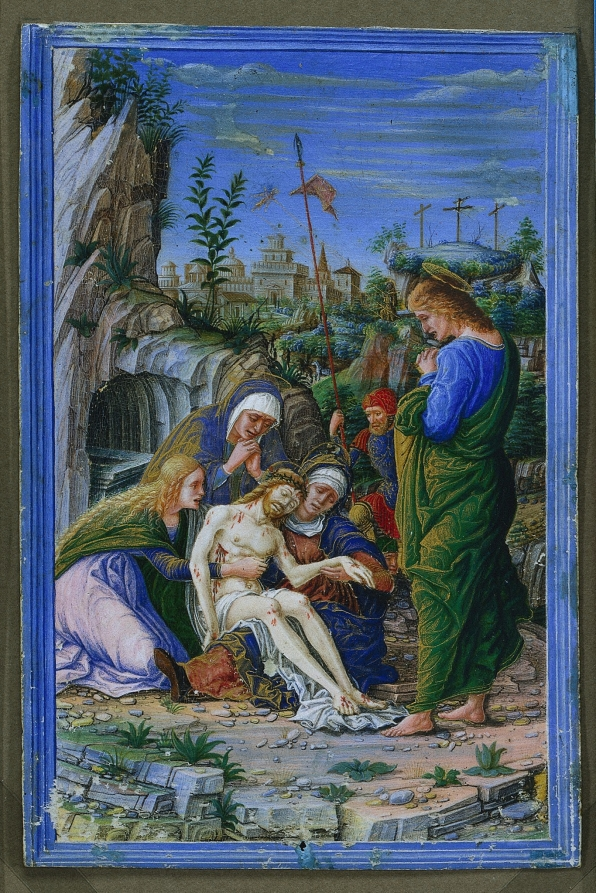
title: Single Leaf from a Book of Hours: Pieta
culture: Italy, Verona(?), 15th century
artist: attributed to Francesco dai Libri (Italian, 1452–1506)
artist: after Andrea Mantegna (Italian, about 1431–1506)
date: c. 1475–85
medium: tempera and gold on vellum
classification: Manuscript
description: One section of a book of hours is known as the Prayers to the Virgin. Dedicated to the Virgin Mary, this group of prayers is written in the first person singular, which allowed readers to insert themselves into the prayer. A reader would begin by calling upon the Virgin Mary and Saint John, with whom they would plead, as saints were considered intercessors who could emphasize a supplicant’s faithfulness. Plaintive or urgent in tone, these prayers are considered some of the most moving texts in books of hours. To accompany them, illuminations often show the Virgin and Child or the Pietà, the Virgin cradling the dead body of Jesus after its removal from the cross.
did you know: All books of hours contain the same basic sections, the order of which can shift, and individual prayers can vary, sometimes significantly, from region to region.